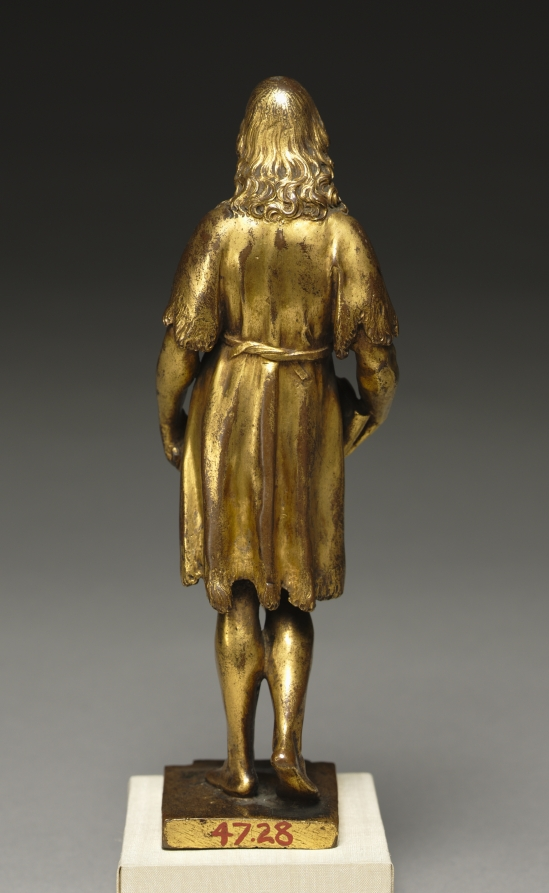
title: Saint John the Baptist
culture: Italy, Venice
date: c. 1550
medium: gilt bronze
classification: Sculpture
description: This small bronze, covered with gold, was produced in multiple versions. Saint John stands here, looking calm and composed, in a rather graceful pose. This piece has a sense of forward motion even though the figure appears to be leaning back in this stance. Elegant and subtle, this piece is a beautiful example of small cast Renaissance bronzes.